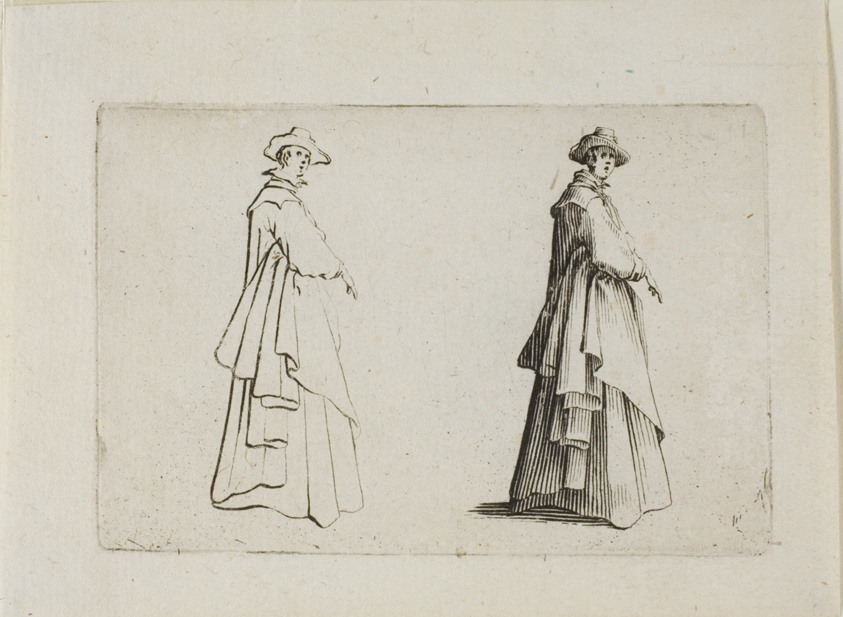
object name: Print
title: The Lady with Full Clothing, from The Caprices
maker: Jacques Callot (French, 1592-1635)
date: c. 1622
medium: Etching on ivory laid paper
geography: France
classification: etching; print; prints and drawing